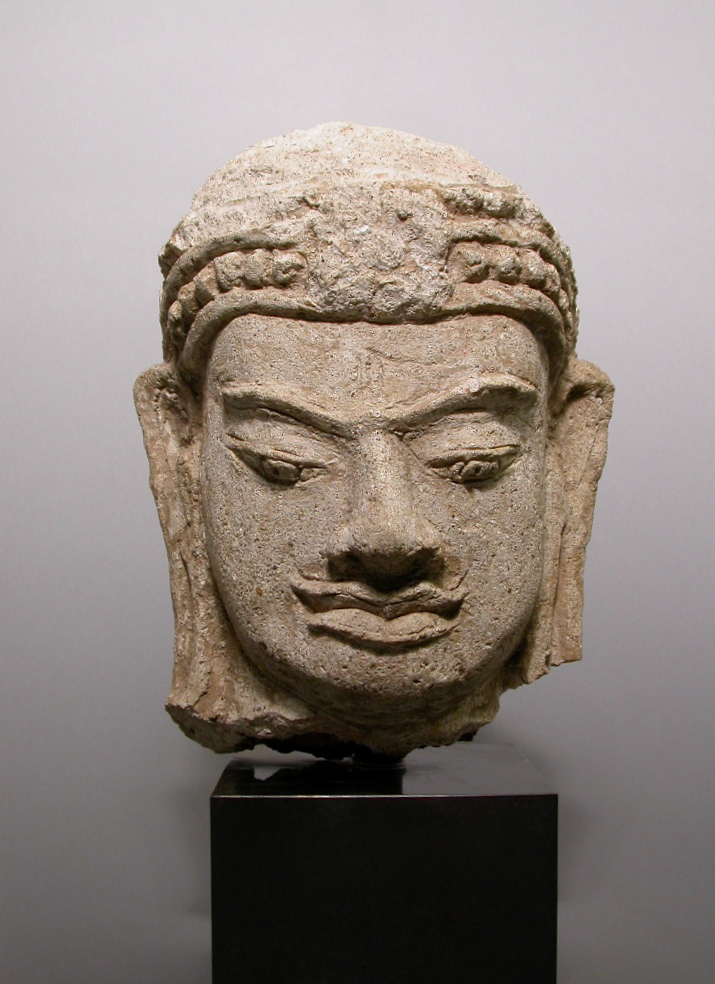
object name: Sculpture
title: Crowned Head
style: Southeast Asian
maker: Thailand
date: Mon period, 8th‒12th century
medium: Stucco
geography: Thailand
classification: stuccowork; sculpture; asian art